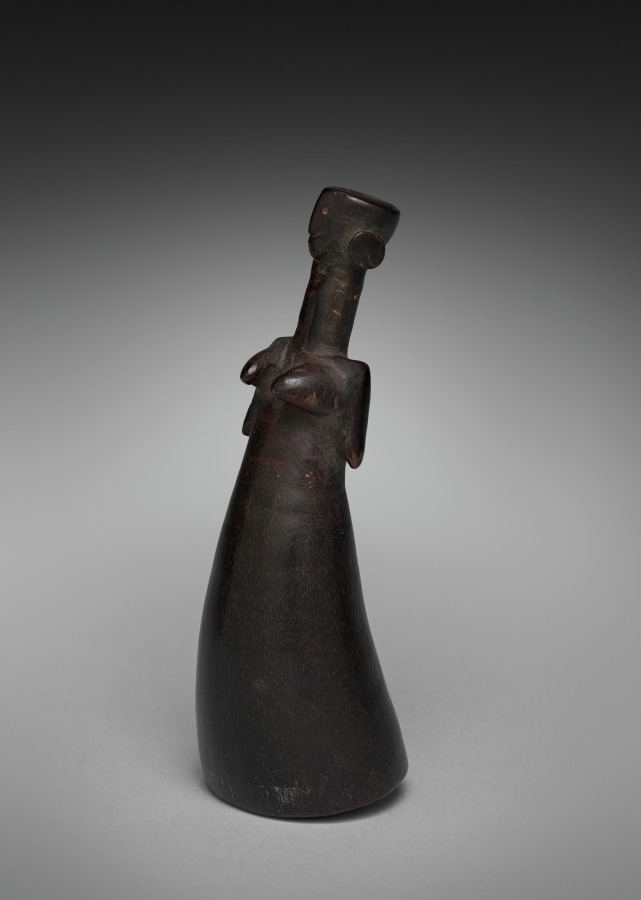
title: Snuff Container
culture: Africa, Southern Africa, Lesotho, South Sotho maker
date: 1800s-1900s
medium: Horn and wood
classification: Vessels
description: This snuff container in the form of a human (female) figure was carved from cattle horn. The form of the image follows the curve of the horn, with arms and hands held to the chest. Despite its smallish size and minimalist execution, this object demonstrates considerable expressive power. Cattle had special meaning for the pastoralist peoples of southern Africa in that it stood for the wealth and status of the individual and the group. However, similar to the ideas associated with tobacco and snuff, cattle also referred to the world of the ancestors. Snuff containers like this one had great significance for their owners and users.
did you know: The tobacco product snuff was stored in decorative, yet useful, containers like this one.